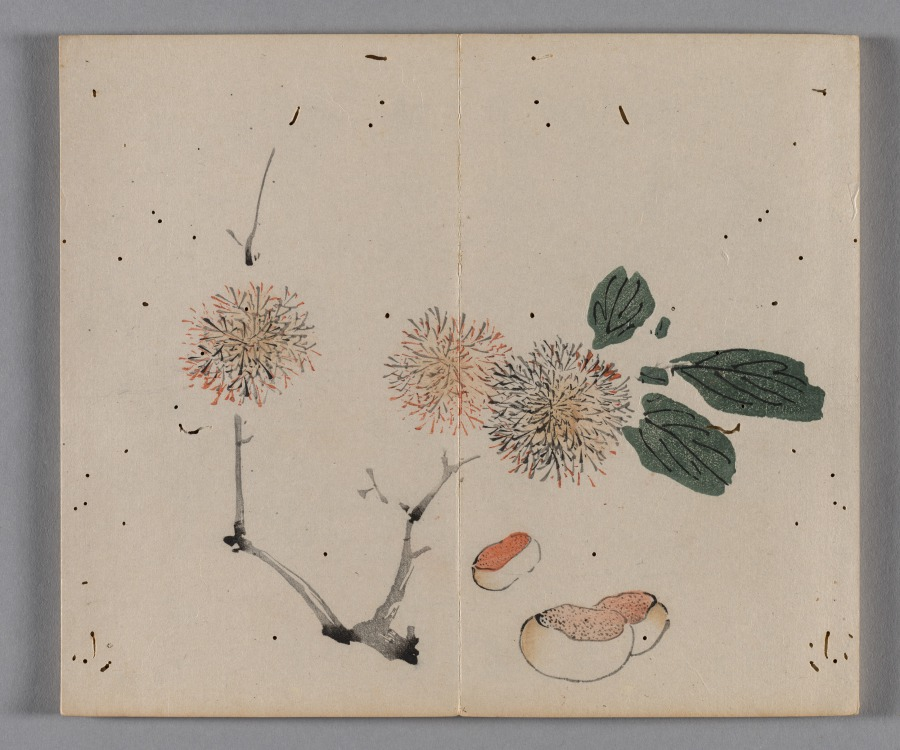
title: Ten Bamboo Studio Painting and Calligraphy Handbook (Shizhuzhai shuhua pu): Fruit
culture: China, Qing dynasty (1644-1911)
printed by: Hu Zhengyan (Chinese, c. 1584–1674)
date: 1633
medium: Woodblock-printed book; ink and colors on paper; first edition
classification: Print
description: Color printing reached a level of perfection in the early 1600s, as seen in this Ten Bamboo Studio Collection of Calligraphy and Painting and the Mustard Seed Garden Manual of Painting (printed 1679 and 1701). The painterly quality, precision in registering (aligning) the woodblocks, and harmonious colors made them the most successful color print editions in Chinese history. Both editions were printed and compiled in Nanjing, spread nationwide, and had a great impact on the arts in Japan and Korea.